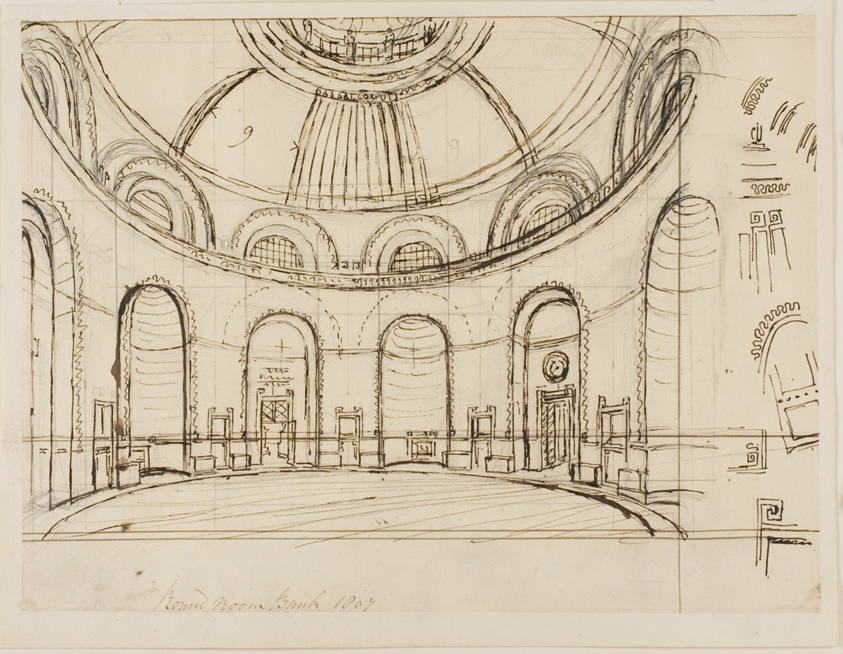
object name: Drawing and Watercolor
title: Round Room Bank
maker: Augustus Charles Pugin (English, born France, 1762-1832)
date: 1807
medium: Pen and brown ink and graphite, on cream wove paper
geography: England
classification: pen and ink drawings; graphite; drawings (visual works); prints and drawing